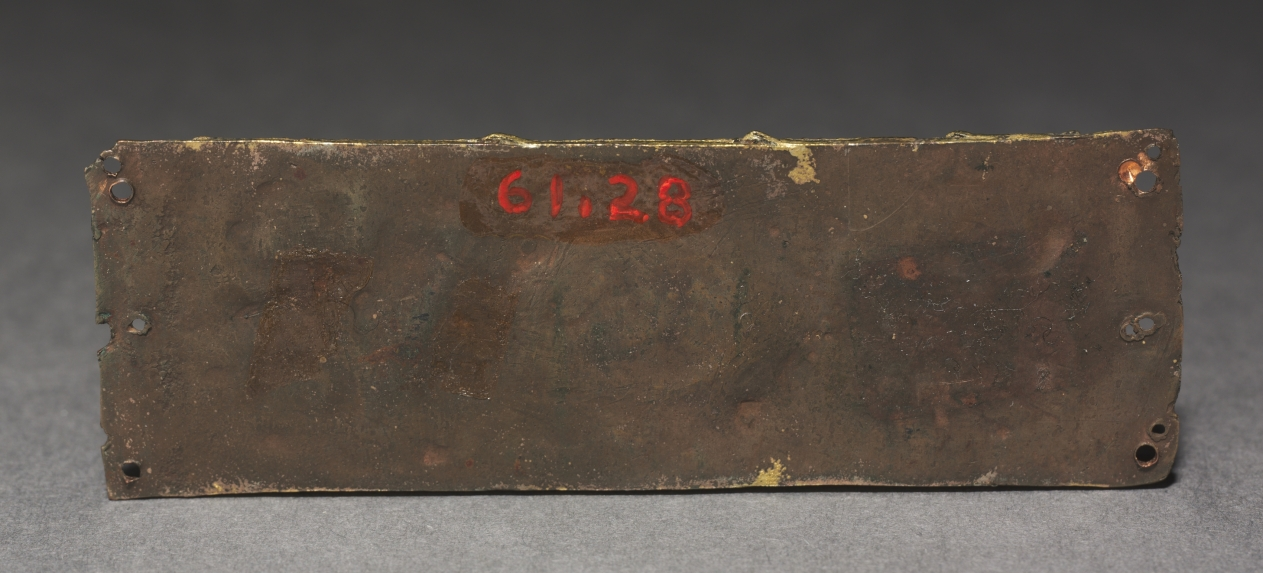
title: Decorative Plaque, Probably from a Reliquary Shrine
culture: Germany, Cologne?, Romanesque period, 12th century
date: c. 1200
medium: gilded copper, gold wire, cabochons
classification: Enamel